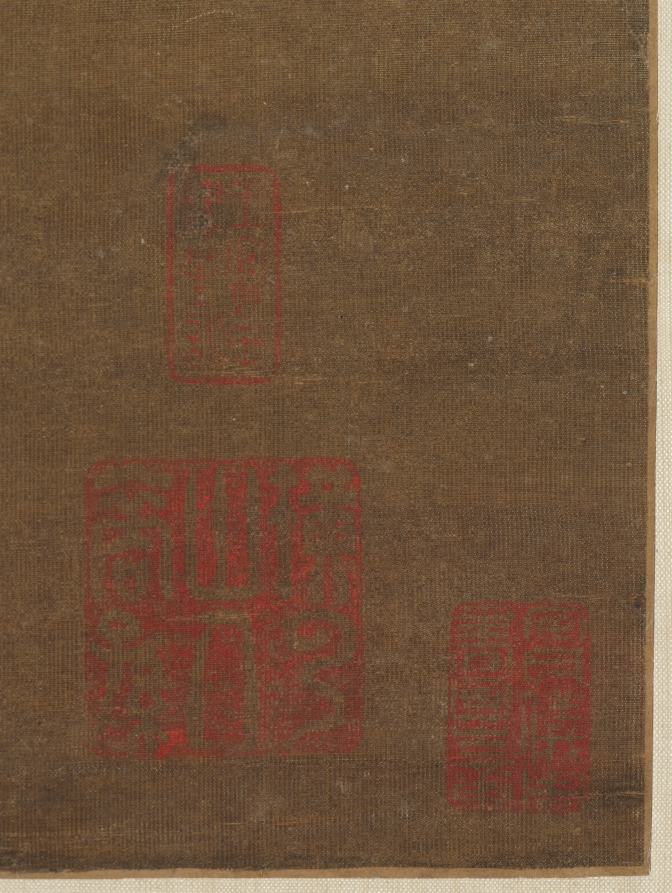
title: Summer Mountains (after Dong Yuan [active c. 937–75])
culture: China, Yuan dynasty (1271-1368)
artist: attributed to Huang Gongwang (Chinese, 1269–1354)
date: 1290–1354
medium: hanging scroll; ink and slight color on silk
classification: Painting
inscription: 【印】一峰道人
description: This monumental landscape is drawn in softly rounded strokes with darker lines frequently applied on top of lighter ones. This technique recalls one of the suggestions included in a collection of the artist's writings known as Secrets of Landscape Painting: The most difficult thing in painting is using the ink. The artist begins by using dilute ink and builds it up to the point where it begins to look right, then uses dense, black ink, applied fairly dry, and washes of deeper-toned ink. This technique distinguishes the fields from the paths, the far from the near. Huang Gongwang may have learned this technique from observing nature through the eyes of an earlier master, Dong Yuan, a painter whose style he shared.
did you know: The wet hills and moist, rich atmosphere evoke the southern Chinese summer, characterized by monsoon rains and lush growth.